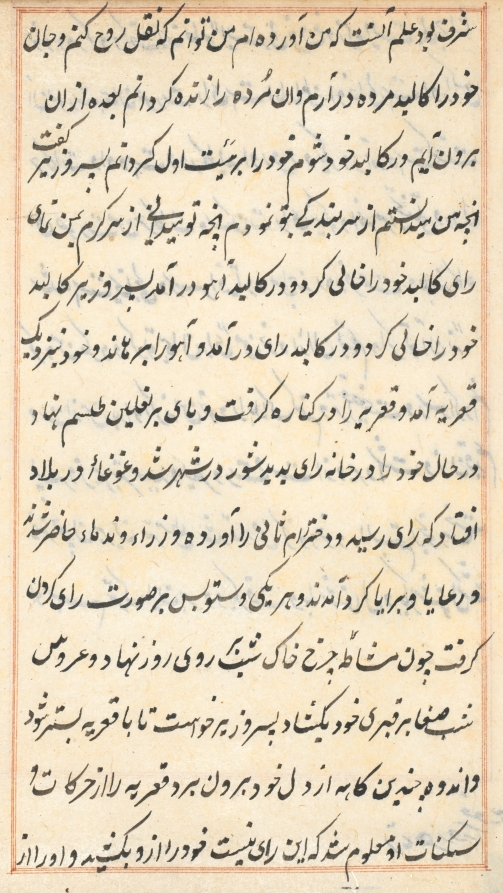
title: Page from Tales of a Parrot (Tuti-nama): text page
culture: Mughal India, court of Akbar (reigned 1556–1605)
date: c. 1560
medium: gum tempera, ink, and gold on paper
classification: Painting